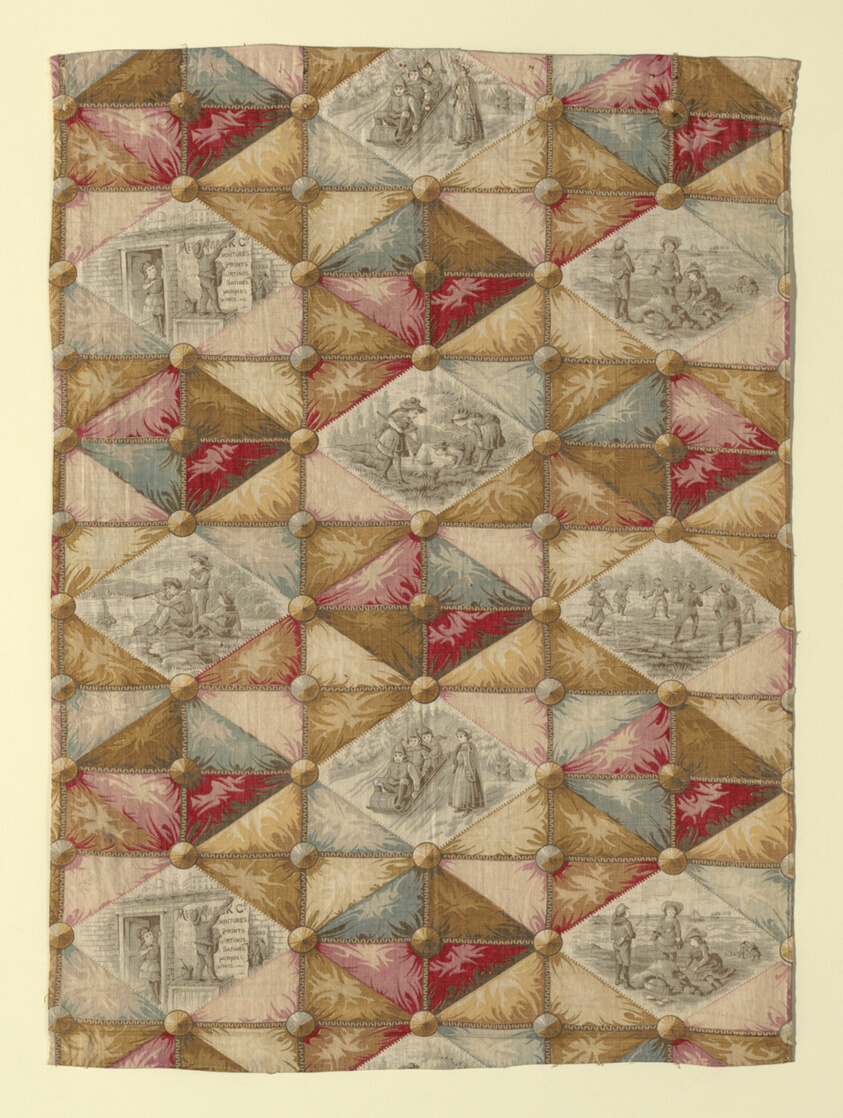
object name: Textile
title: Children at Play (Furnishing Fabric)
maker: Printed and Manufactured by Merrimack Manufacturing Company (United States, founded 1823); United States, Massachusetts, Lowell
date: 1886/90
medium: Cotton, plain weave; block and engraved roller printed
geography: Massachusetts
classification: textile; weaving - printed; printed textile; furnishing textile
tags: children